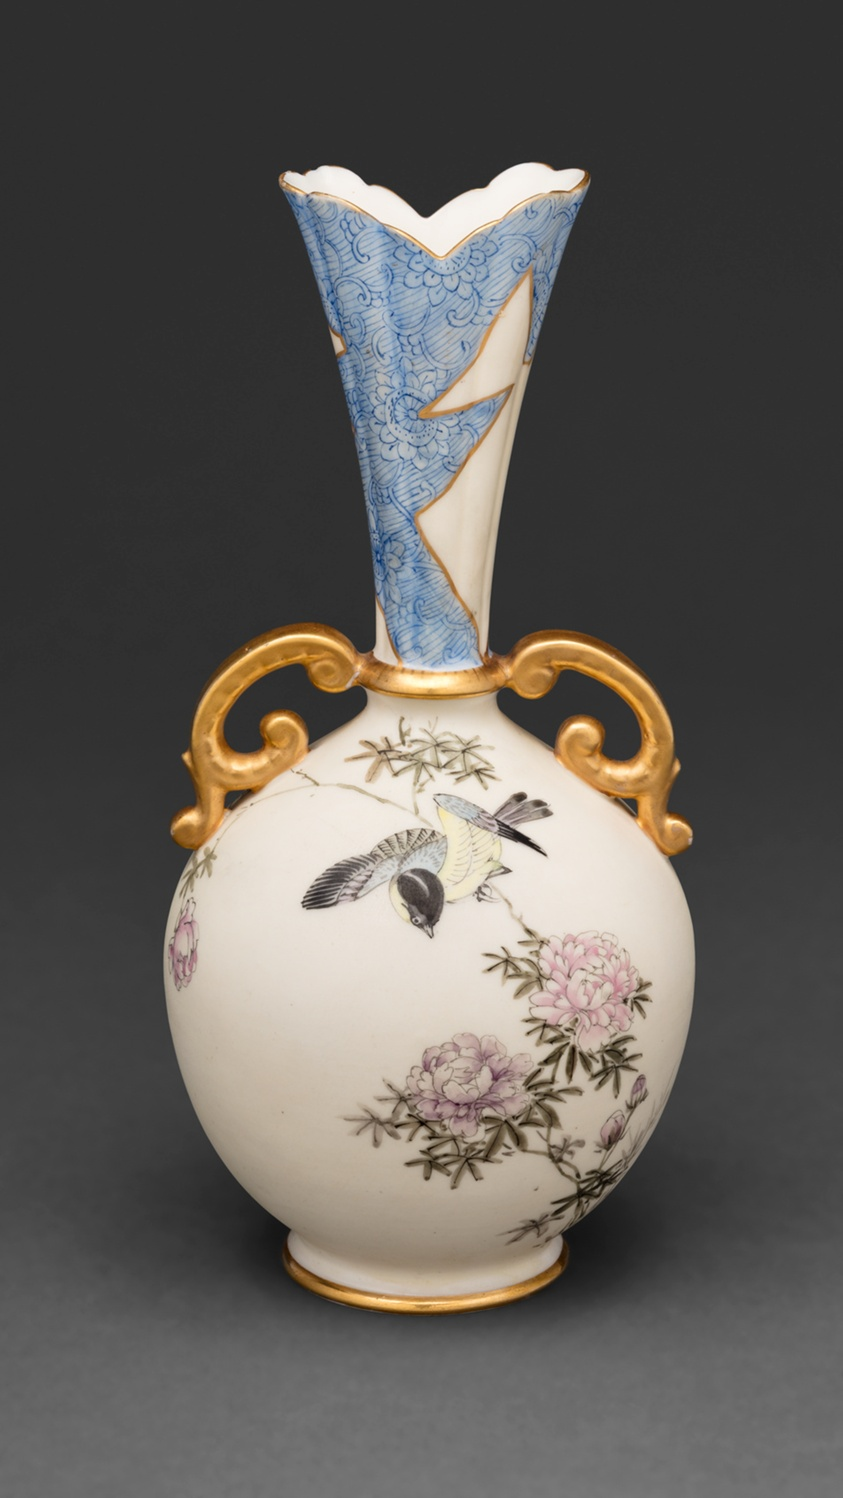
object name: Ceramics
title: Vase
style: Aesthetic Movement, 19th century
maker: Ceramic Art Company; American, 1889–1906; Trenton, New Jersey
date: 1894–96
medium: Porcelain with overglaze material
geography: Trenton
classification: ceramics; american decorative arts; art of the americas; decorative arts; porcelain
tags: birds